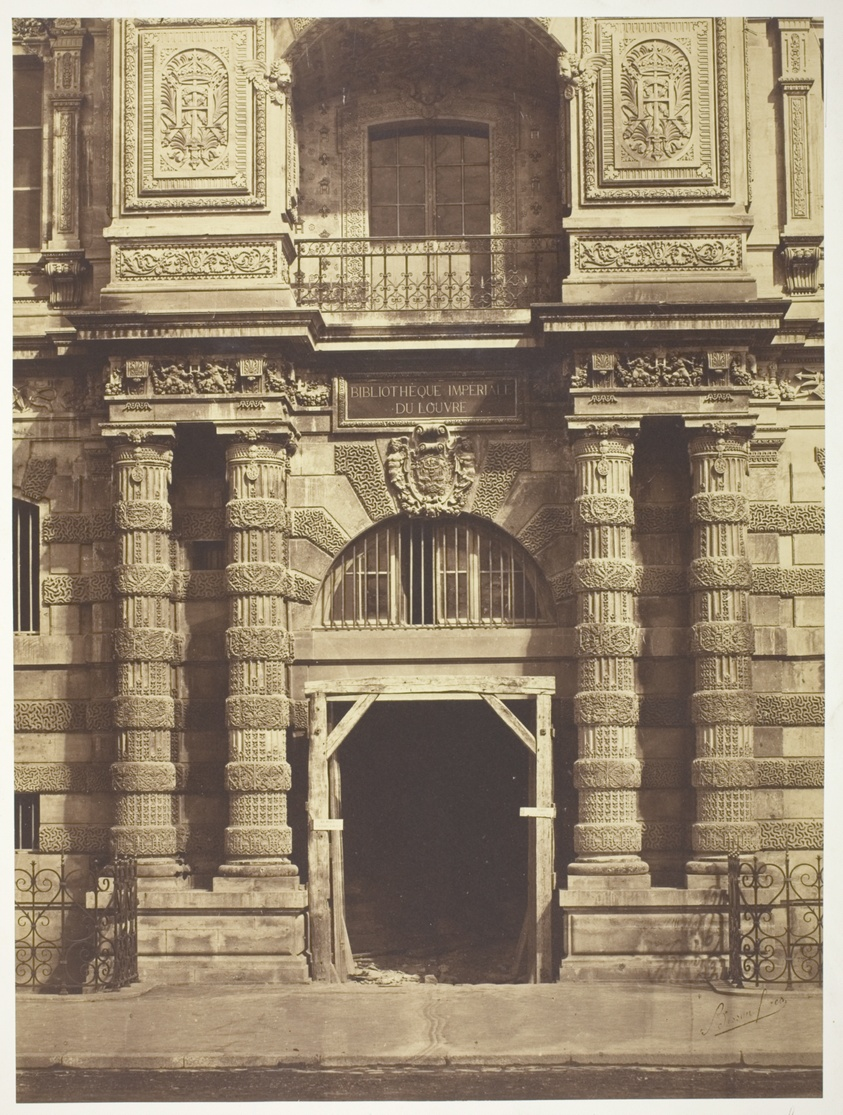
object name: Photograph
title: Bibliothèque Imperial du Louvre, Paris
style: 19th century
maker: Bisson Frères (Louis-Auguste Bisson, French, 1814–1876 and; Auguste-Rosalie Bisson, French, 1826–1900)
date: 1854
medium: Albumen print, from the album "Le Napoléonium, monographie du Louvre et des Tuileries réunis" (1856)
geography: France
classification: albumen silver print; photographic process; photography; photograph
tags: Collected by Hugh Edwards, architecture, Paris